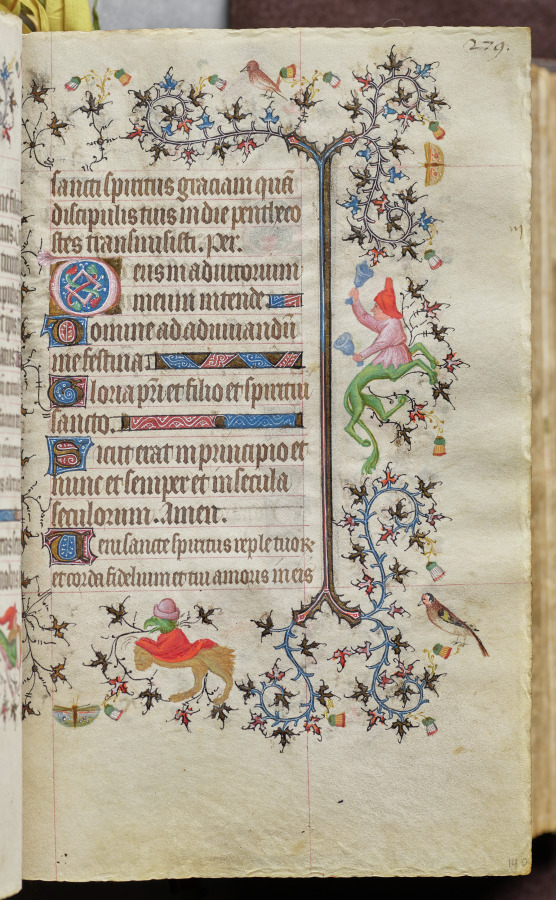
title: Hours of Charles the Noble, King of Navarre (1361-1425): fol. 140r, Text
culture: France, Paris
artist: Master of the Brussels Initials and Associates (French)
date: c. 1405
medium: ink, tempera, and gold on vellum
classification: Bound Volume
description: This precious volume was obviously highly prized by its owner, the French-born King of Navarre, who had his coat of arms painted on no less than twenty folios. Rather than directly commissioning this manuscript from a specific workshop, it seems that Charles the Noble acquired his book of hours -- perhaps ready-made for the luxury market -- while on a trip to Paris in 1404-05. A collaborative effort, six painting styles are evidenced within the pages of this codex, those of two Italians, two Frenchmen, and two Netherlanders. The painter who was responsible for the planning and decoration of the book, and who produced seventeen of the large miniatures, was a Bolognese artist known as the Master of the Brussels Initials. His principal assistant, responsible for most of the borders, was a Florentine who signed his name "Zecho" da Firenze on folio 208 verso.